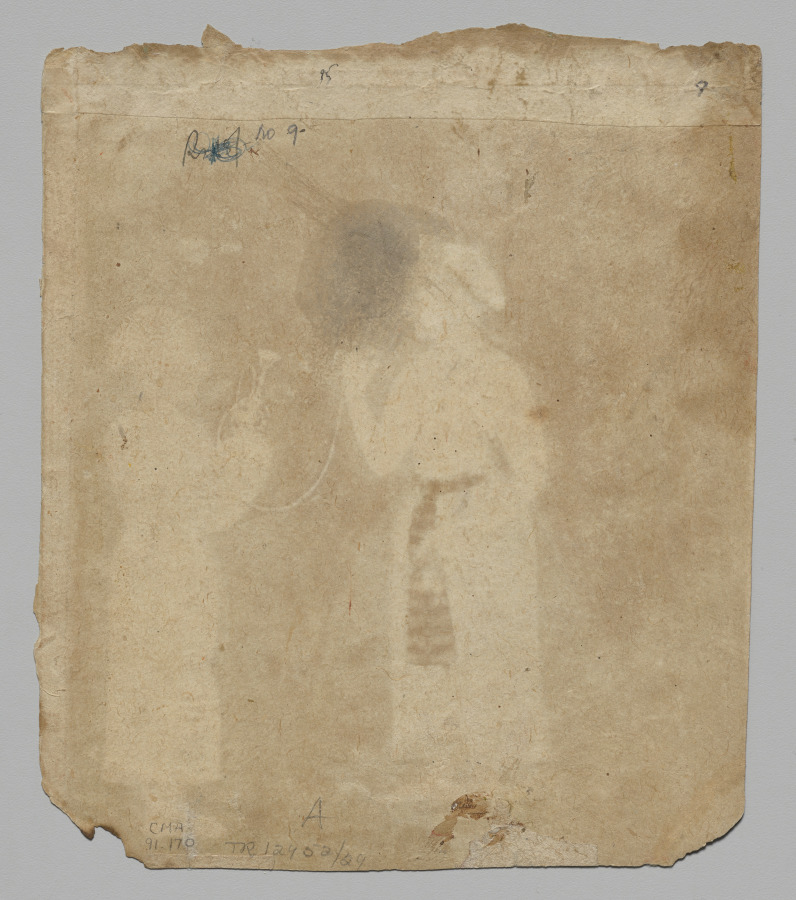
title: Rana Amar Singh II (reigned 1698–1710) smoking a hookah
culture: Northwestern India, Rajasthan, Rajput Kingdom of Mewar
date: c. 1700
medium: Gum tempera and gold on paper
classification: Painting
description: The ruler of the Hindu kingdom in southern Rajasthan is depicted in the manner of a Mughal portrait. His muslin tunic is belted with a sash that has flowering plants embroidered on the border, which was popularized at the court of the Mughal emperor Shah Jahan. Other Mughal characteristics include the color of the background and the flowering plants along the lower border. Sandalwood paste explains the dark areas around his chest and arms.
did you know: The green pigment called verdigris has caused acid deterioration of the paper.